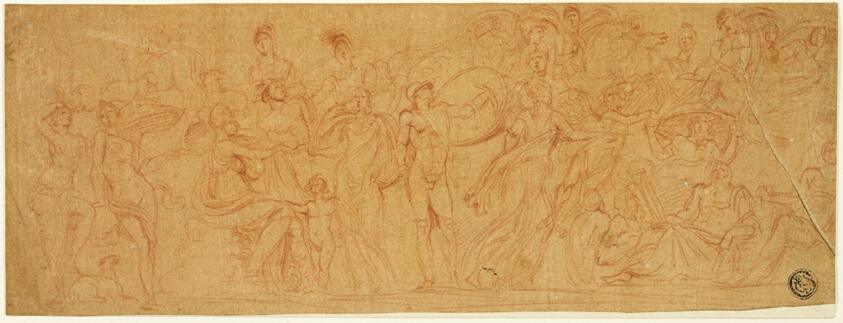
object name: Drawing and Watercolor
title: Sarcophagus with Judgement of Paris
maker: Attributed to Pierre Brebiette; French, 1598-c. 1650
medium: Red chalk on tan tinted laid paper, laid down on ivory wove paper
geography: France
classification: chalk; drawings (visual works); prints and drawing